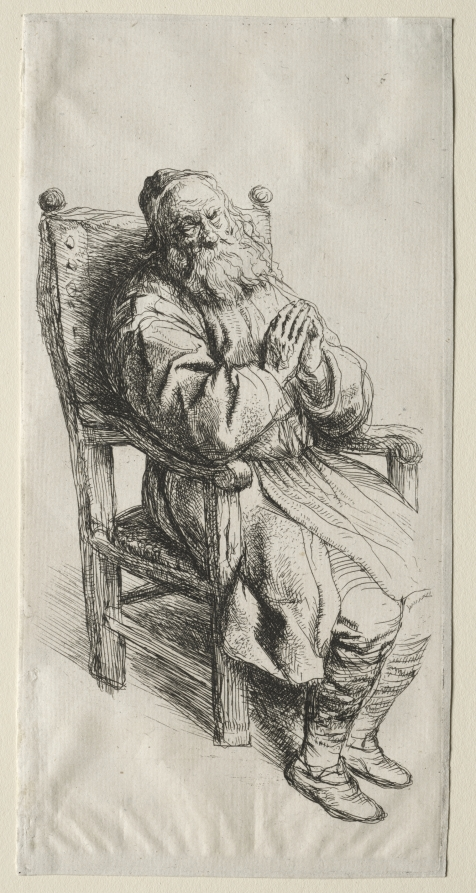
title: An Old Man in a Chair, Praying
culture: Netherlands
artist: Salomon Koninck (Dutch, 1609–1656)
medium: etching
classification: Print